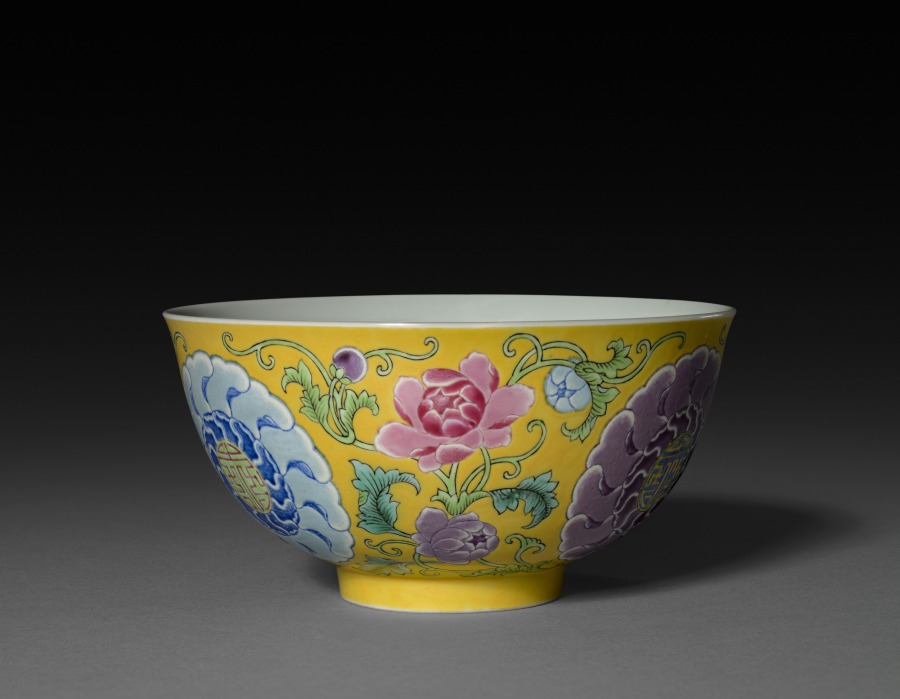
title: Bowl with Floral Sprays and Inscribed Medallions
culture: China, Jiangxi Province, Jingdezhen kilns, Qing dynasty (1644–1911)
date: 1800s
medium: porcelain with famille rose overglaze enamel decoration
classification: Ceramic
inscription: 大清康熙年制